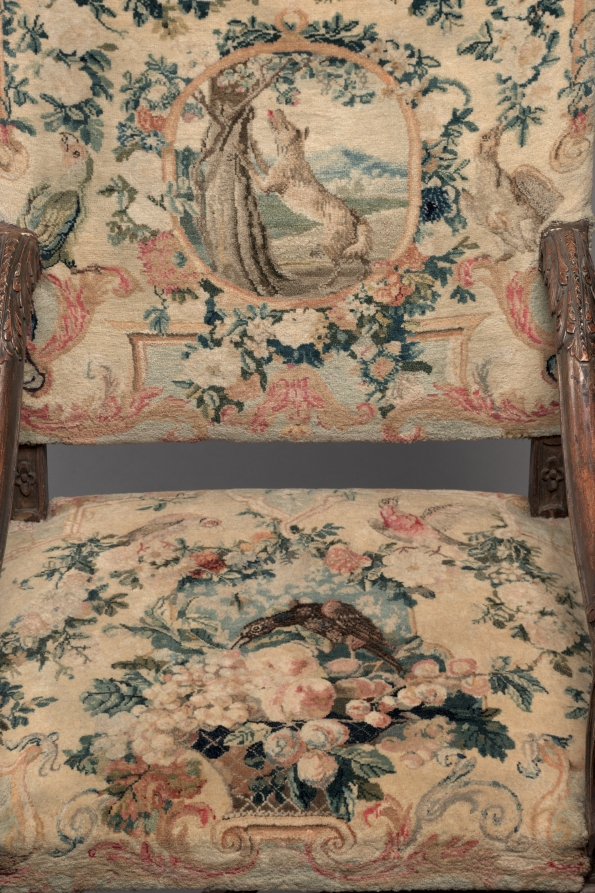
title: Armchair (3 of 4)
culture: France, 18th century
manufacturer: Royal Savonnerie Manufactory, Chaillot Workshops (French, est. 1627)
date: before 1717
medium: carved wood, Savonnerie knotted-pile (symmetrical rug knot) upholstery; wool, hemp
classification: Furniture and woodwork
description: These chairs belong to a suite that includes a settee (also in the CMA’s collection) and a tapestry made for a count and countess to mark their wedding in 1717. Furniture of this scale was usually placed against the wall in grand reception halls, more as a display of wealth than for use. Upholstered in Savonnerie tapestries, this suite was among the most treasured and expensive example anyone could own and typically reserved for royalty. To add decorative and intellectual interest to the textiles, weavers incorporated symbols depicting various stories from the Fables of Jean de La Fontaine, published from 1668 to 1694 and largely adapted from Aesop and other early storytellers.